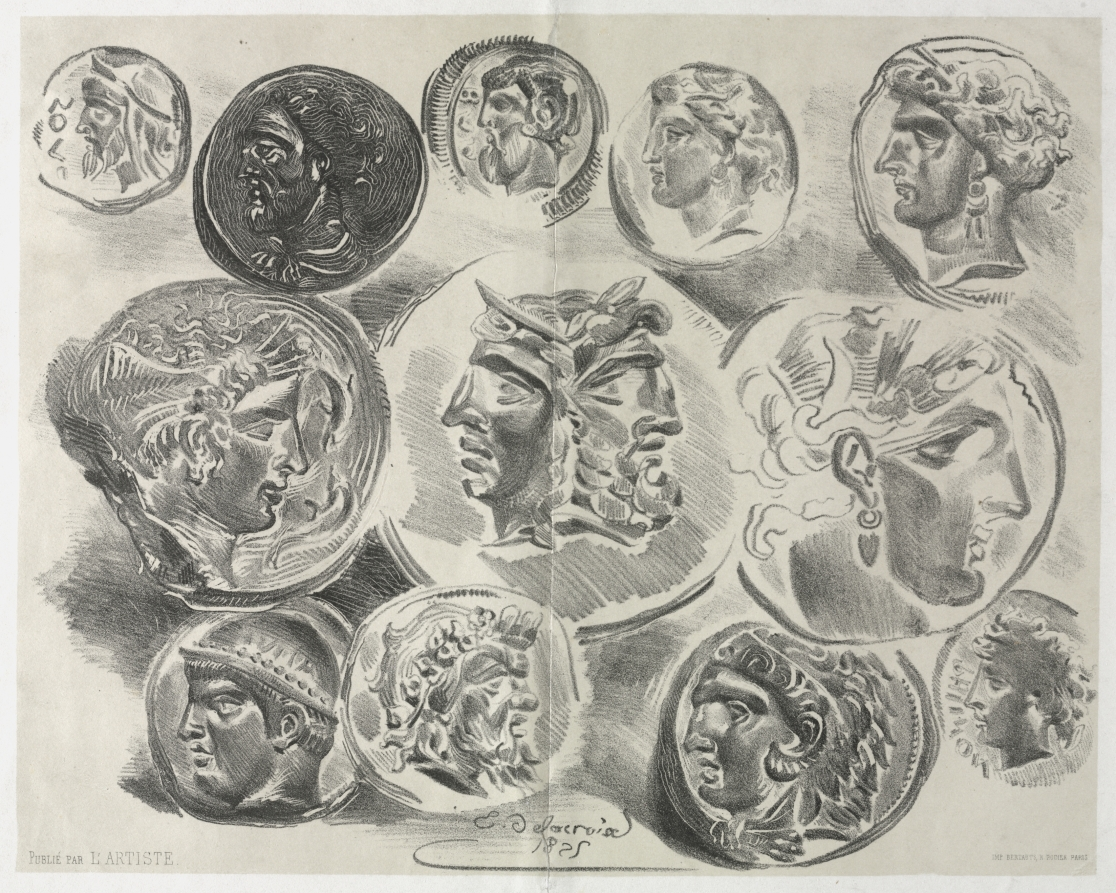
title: Feuille de douze médailles antiques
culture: France, 19th century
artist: Eugène Delacroix (French, 1798–1863)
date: 1825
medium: lithograph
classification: Print